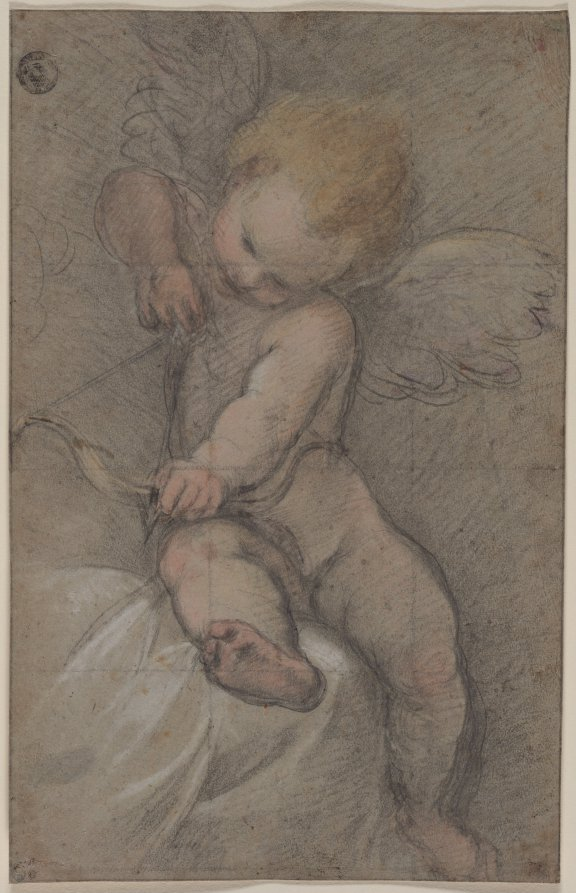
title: Cupid Drawing His Bow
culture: Italy, 16th century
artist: Federico Barocci (Italian, 1528–1612)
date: c. 1560s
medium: black chalk with pastel (stumped in places), heightened with white chalk, squared with black chalk; framing lines in graphite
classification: Drawing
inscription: lower left, in brown ink: [illegible]; verso, upper left, in graphite: 4 [circled]; upper center left, incised: adamid[i?] bl / hotel f[o?] / Chateau Front[as?]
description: This drawing formed part of the painter Federico Barocci's painstaking working method, which began with studies from nature, included sculpted models in wax, and concluded with full-scale cartoons in color. A detailed figure study such as this would have followed numerous compositional and life studies in preparation for the final cartoon. The squares drawn over the figure indicate it was meant to be transferred to a larger format. Barocci may have made this drawing as a preparatory study for his large altarpiece depicting the Martyrdom of St. Sebastian intended for the Bonaventura Chapel in the Urbino cathedral. The legs of the putto were used in his final rendering of the Christ Child in that composition. The technique of using black and colored chalks reflects the introduction, in the 1560s, of colored chalks (called "pastelli") to Italy, knowledge of which likely spread from Venice down the Adriatic coast to Barocci's home in Urbino.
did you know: The grid of squares drawn over this figure was used by the artist or his workshop to transfer the composition to a larger format.